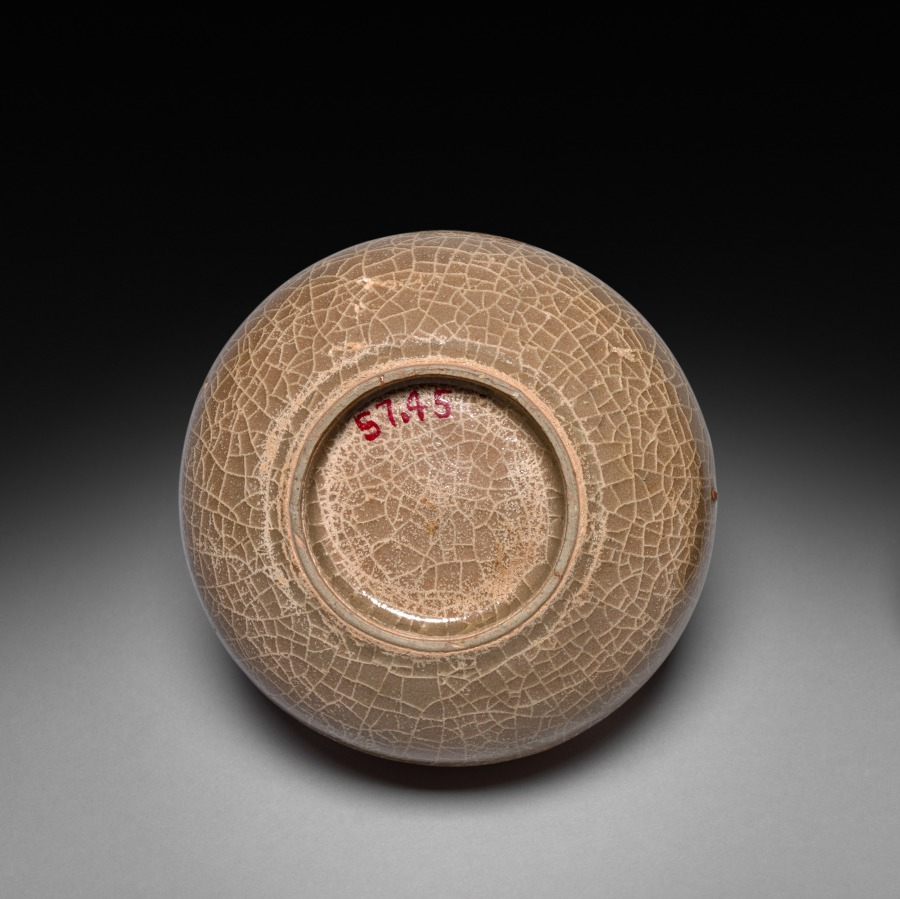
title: Covered Flat Jar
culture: China, Hangzhou, Suburban Altar Kiln, Southern Song dynasty (1127-1279)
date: 1127–1279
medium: glazed buff stoneware, Guan ware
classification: Ceramic